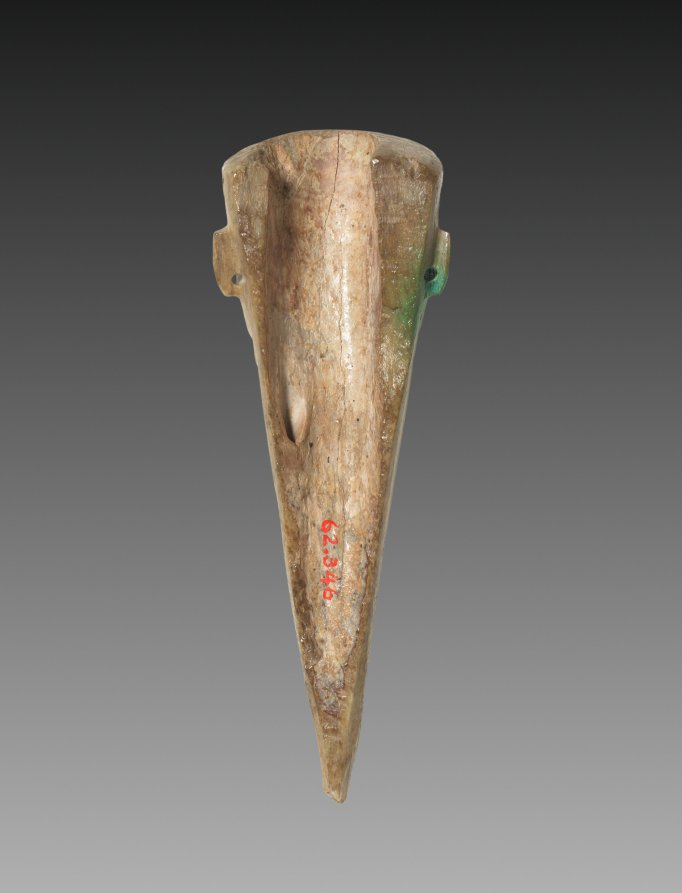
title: Figurine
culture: Iran, early Islamic period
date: 700s–900s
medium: carved bone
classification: Miscellaneous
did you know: Each earlobe is pierced. One is empty, while the other is filled with a substance which has turned the adjacent surface green.